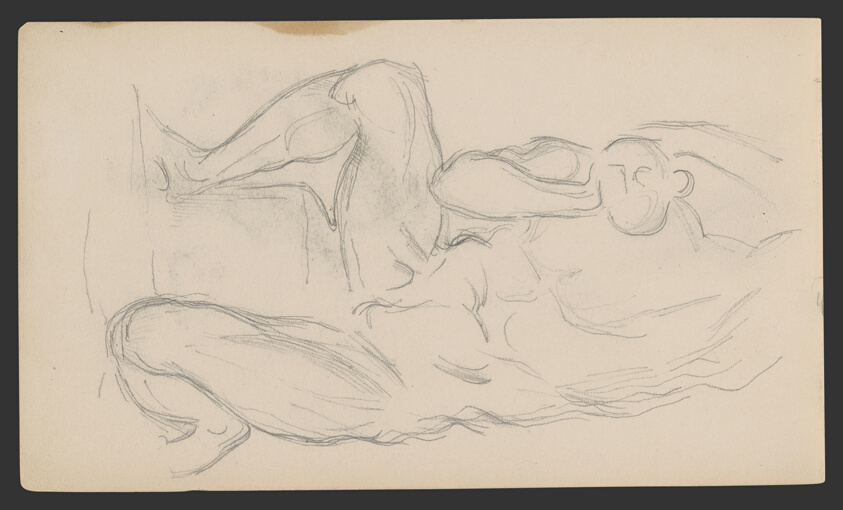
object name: Drawing and Watercolor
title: Sketchbook No. 2 (L'Estaque)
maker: Paul Cézanne; French, 1839-1906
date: 1875–86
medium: Graphite and pen and ink drawings on paper, bound into a book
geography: France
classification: sketchbook; graphite; prints and drawing; paper